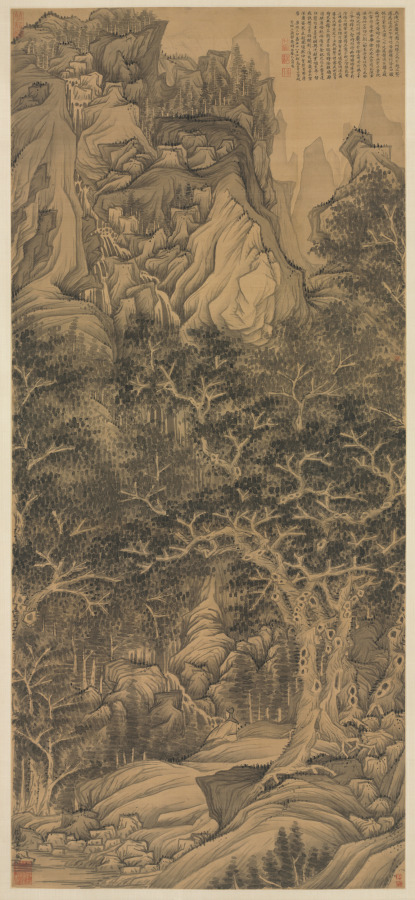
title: The Mountain of Five Cataracts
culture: China, Ming dynasty (1368–1644)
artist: Chen Hongshou (Chinese, 1598/99–1652)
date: c. 1630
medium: hanging scroll; ink on silk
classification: Painting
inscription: Artist's signature and seal at middle right edge: Hongshou [seal] Zhanghou 洪绶 [印]章侯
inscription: Inscription by Gao Shiqi 高士奇 (1645–1704): The Mountain of the Five Cataracts is bordered by three prefectures--Wu [Jinhua], Hang [Hangzhou], and Yue [Shaoxing]--and is quite close to Jiyang [Zhuji] in Yue. The landscape there is extraordinary and precipitous, with ridges and peaks standing in circles. Rocks of strange shapes gaze down everywhere, while maple and bamboo provide shade. The water from five pools overflows and is suspended in five steps--that is why it is called "Five Cataracts." Xie Yuanqing [Xie Tiao 謝朓, c. 464–499] of the Qi Dynasty gathered medicinal herbs here; Diao Jingchun [Diao yue 刁約, 11th century] of the Song Dynasty also visited here; Song Jinhua [Song Lian 宋濂, 1310–1381] and Xu Tianchi [Xu Wei 徐渭, 1521–1593] both wrote travel notes about the place; and Chen Hongshou painted here. His mountains are done in the style of the Six Dynasties masters; the trees are after those of Dong Beiyuan [董源 Dong Yuan, active during the Five Dynasties]--the painting seems to be richly imbued with the primeval spirit. Xu Wei said that the grotto is unique for the shade (yin) and the five cataracts unusual for the sun (yang). There are seventy-two peaks, with a ravine between two cliffs. At times they are bright and at other times, gloomy; sometimes they seem to be open, sometimes closed, yet often border uniquely between shady (yin) and sunny (yang). Zhanghou [Chen Hongshou] really succeeded in capturing that spirit. As a young man indulgently boating through Shanyin [Shaoxing],/ I became familiar with the beauty of the Five Cataracts./ The cold streams, when level, become pools clear as crystal./ Pouring foam mingled with flying waterfall,/ Its shapes constantly changing./ Water would flow downward without a sound,/ Or become raging billows emitting echoes./ Sometimes the wind from the sky would wail,/ The green forest during the day would turn dark./ Sometimes it was dangerous and difficult to ascend,/ For the moss was slippery on the stone steps in those precipitous cliffs./ After reading the travel notes of Sung [Lian] and Xu [Wei],/ I'm afraid their descriptions are incomplete. / Yet when Laolian [Chen Hongshou] was seized with the inspiration to paint,/ His brush and ink moved with exhilaration./ It is as if mists have risen/ From a hot cooking pot, gradually opened./ By hanging this on a plain wall,/ One can clearly listen to the quiet night./ At the end of the year, ice and snow are deep;/ The cold air in the quiet studio is frozen./ Near the fireplace, I make with it a silent, spiritual acquaintance/ Burning incense and striking a lucid qing [stone chime]. On the eighteenth day of the twelfth month in the jimao year of the Kangxi era [1699]. Jiangcun, Gao Shiqi. Zhuchuang inscribed this at Zhe in the Lan Jing studio. It was the third day after the beginning of spring. trans. LYSL/HK/WKH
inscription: Collector's inscription by Gao Shiqi 高士奇 (1645–1704), one column in standard script at the lower left corner: 信天巢秘藏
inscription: 5 seals of Gao Shiqi 高士奇 (1645–1704): 竹窗 Zhu Chuang; 高士奇 Gao Shiqi; 澹人 Danren; 簡靜齋 Jian Jing Zhai (Gao Shiqi's studio; at the upper left corner); 高氏江村草堂珍藏書畫之印 Gaoshi Jiangcun Caotang Zhencang shuhua zhi yin (at the lower left corner).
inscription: Two additional seals at the lower left and right corners are undecipherable.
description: A unique landscape painting in the existing body of Chen Hongshou’s art, this painting reveals his involvement with the practice of fang (imitation) to achieve creative transformation. Chen acquired the tradition stemming from Dong Yuan of the Five Dynasties, with which he sought an artistic individuality that lends his work an idiosyncratic vision and extraordinary power.